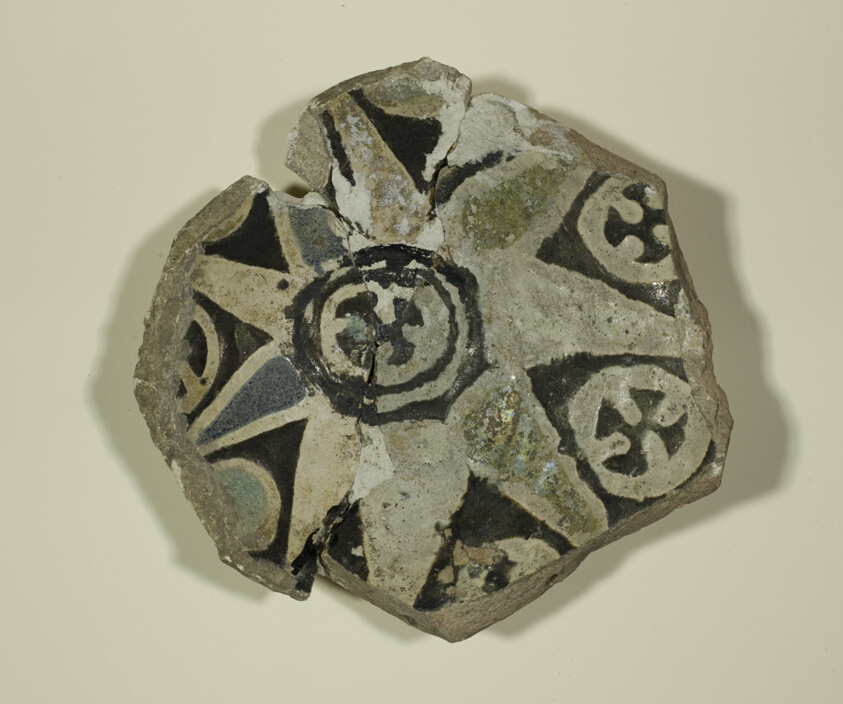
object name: Decorative Arts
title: Fragment of a Bowl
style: byzantine, european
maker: Byzantine or Italian; Italy, Campania or Apulia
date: 13th-14th century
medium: Ceramic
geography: Istanbul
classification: fragment; ceramics; vessel; bowl; asian art; decorative arts